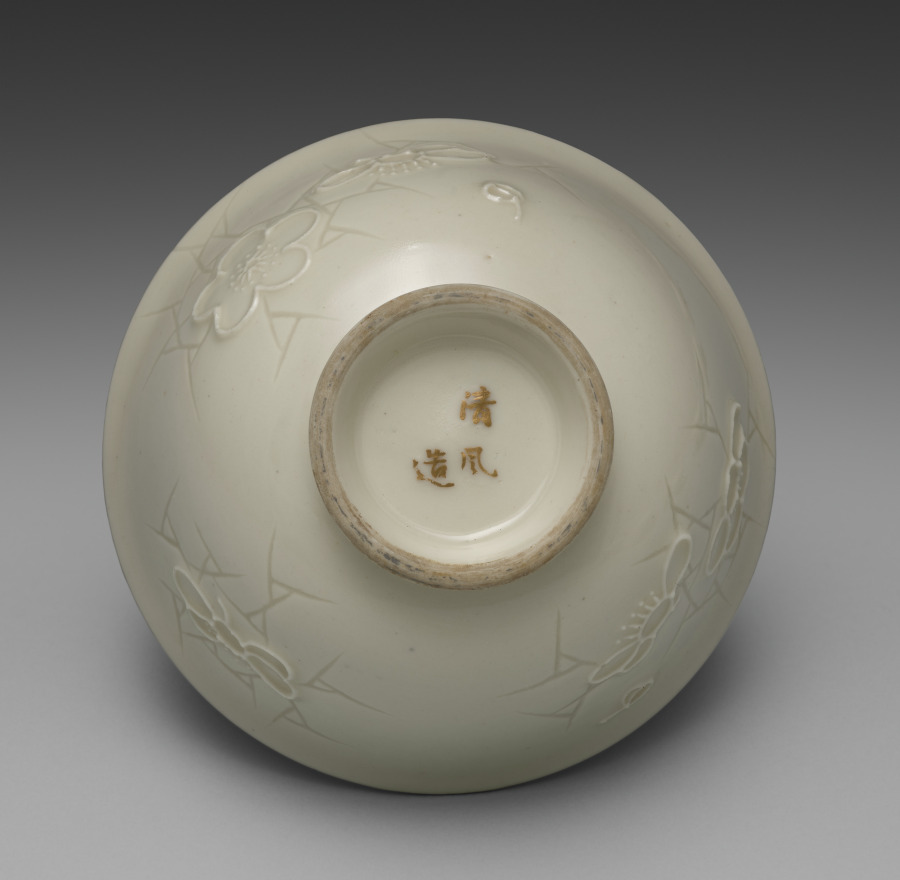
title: Bowl from Dining Set with Plum Blossoms and Cracked-Ice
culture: Japan, Meiji period (1868–1912)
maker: Seifū Yohei II (Japanese, 1844–1878)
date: c. 1875–78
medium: Porcelain with molded designs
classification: Ceramic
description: Each item in this set has a delicate low-relief design of flowering plum branches over scattered, intersecting lines meant to resemble the cracked-ice surface of a frozen body of water and is signed on the base in gold pigment. While Yohei II produced many fine works in underglaze blue, like those produced by Kiyomizu Shichibei, he also made works in quite different styles later in his career, from the early 1870 s. In 1873, he was appointed purveyor to the Industrial Center of Kyoto Prefecture, a designation associated with Kyoto’s efforts to reach an international market through the port of Kobe; and from 1875 until his death, he was involved in national-level projects to present Japanese ceramics across the world. It was during this period that Yohei III was apprenticed to Yohei II, and it has been suggested that this set may in fact be an early example of Yohei III’s work, which he signed with his teacher’s name. Decorated with flowers resembling Japanese textile motifs, the set calls to mind the design of Yohei II’s pair of vases with plum blossoms in the Victoria and Albert Museum. Here, the elaborate trees created for a formal public exhibition setting have been translated into the approachable blossoms of the genteel domestic environment. While the designs are consistent across the pieces, each raised flower petal and pistil and each incised line in the ice was done by hand, so the cups, bowls, and dishes are similar yet unique. The bottoms of two boxes once identified the set’s owner, but the information has been deliberately obscured with black ink. However, inscriptions still visible appear to indicate two occasions, once at the end of July 1886 , and once again in June 1916 , when parts of the set were requested from Hokura in Niigata Prefecture. The location corresponds to a neighborhood in the present-day city of Jōetsu. The surname Tsuji 辻 also appears on a paper tag affixed to one of the box cloths. Future research may possibly reveal more about their provenance. A vase by Yohei III in a private collection combines the formal grandeur of the Yohei II vases in the Victoria and Albert Museum with the gentler design of this dining set, placing flowering plum trees against soft, scalloped-edge clouds resembling those in golden screens.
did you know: The dining wares have a creamy white coloration that the four boxes containing them identify as Korean in style.